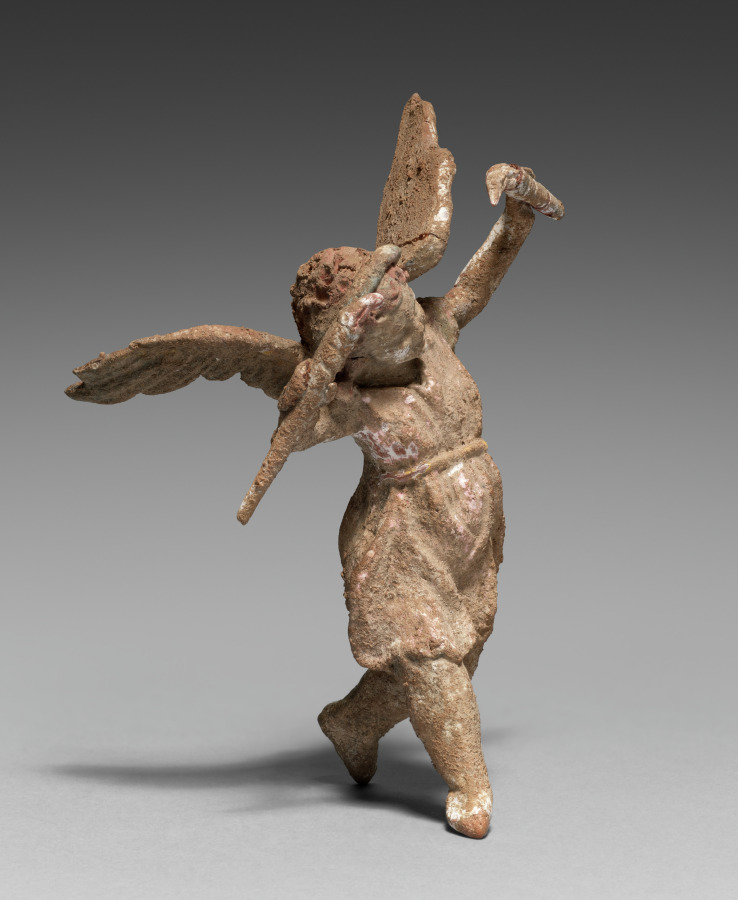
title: Figurine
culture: Greece, Myrina, Hellenistic Period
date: 300–100 BCE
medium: terracotta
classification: Sculpture